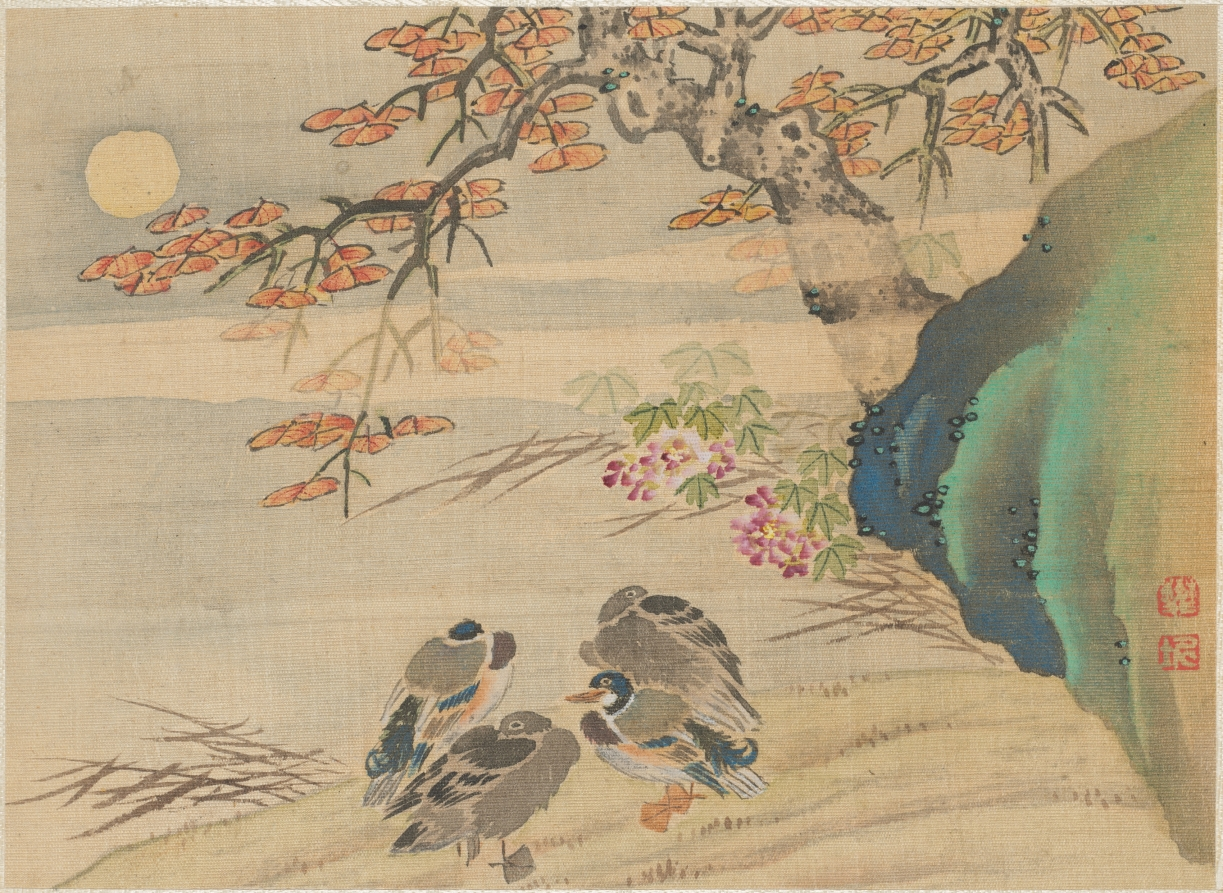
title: Album of Miscellaneous Subjects, Leaf 8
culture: China, Qing dynasty (1644-1911)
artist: Fan Qi (Chinese, 1616–after 1694)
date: early 1650s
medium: album leaf; ink and color on silk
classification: Painting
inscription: Artist seal: Fan Qi 樊圻. Poem by Li Bing 李炳 (17th century): Maple leaves drift in the wind, the autumn gusts bracing,/ Hibiscus flowers steeped with water, the evening breeze light./ The moonlight's slanting beams shine upon dreaming lovers./ No wonder that pair of fowl should dream of the absent partners.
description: Leaf 8 Li Bing's colophon reads: Maple leaves drift in the wind, the autumn gusts bracing, Hibiscus flowers steeped with water, the evening breeze light. The moonlight's slanting beams shine upon dreaming lovers. No wonder that pair of fowl should dream of their absent partners.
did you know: The rock changes from ochre to green deepening into azurite blue accented with delicate dots of malachite green.